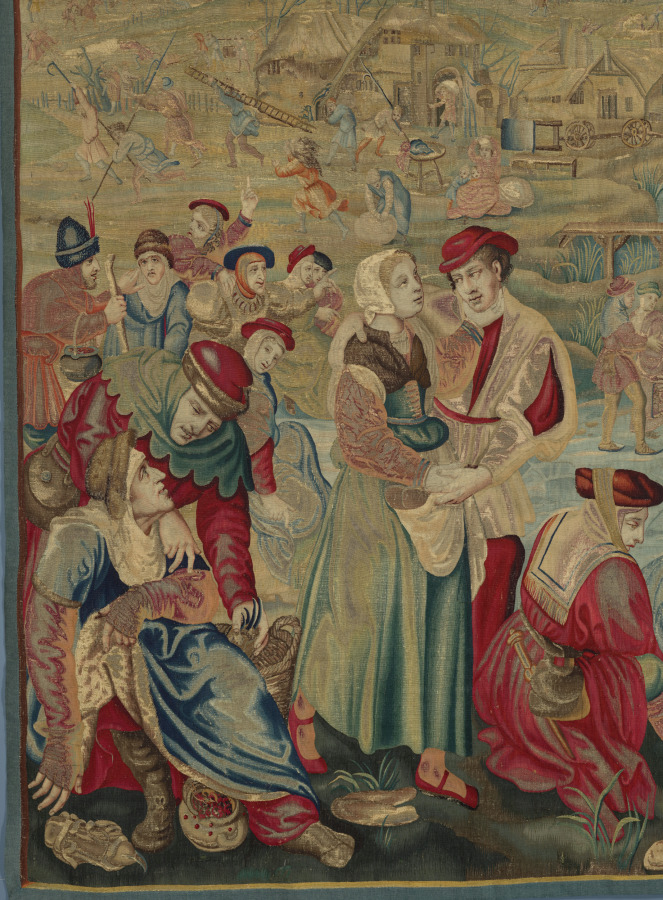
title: Winter: Skating Scene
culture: France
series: Four Seasons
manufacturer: possibly by Gobelins Manufactory (France, Paris, est. 1662)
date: designed c. 1535, woven mid- to late 1600s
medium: Wool, silk, and gold filé: tapestry weave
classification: Tapestry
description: People of all classes and ages enjoyed ice skating, a winter pastime popularized in the Netherlands. Here, some couples are already skating and slipping on the ice, while others tie on their skates or huddle around braziers (portable coal heaters) to keep warm. One affectionate couple in the foreground hold hands as they walk. A castle on the far edge of the frozen lake occupies the background. In the left distance, several small figures holding ladders and long hooks run toward a building that has caught on fire, a frequent occurrence in the winter when wooden houses were heated by fireplaces.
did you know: If you look closely you can see that the top edge of this scene is missing; look at the top of the castle on the right or the forest fire on the left.